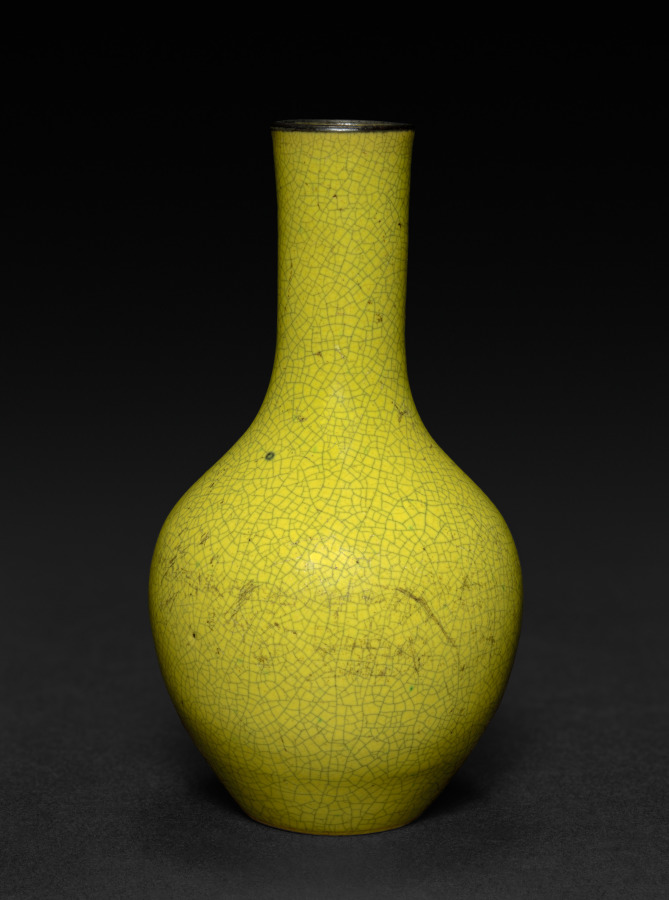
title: Vase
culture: China, Qing dynasty (1644-1911)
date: 1644–1911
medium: porcelain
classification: Ceramic